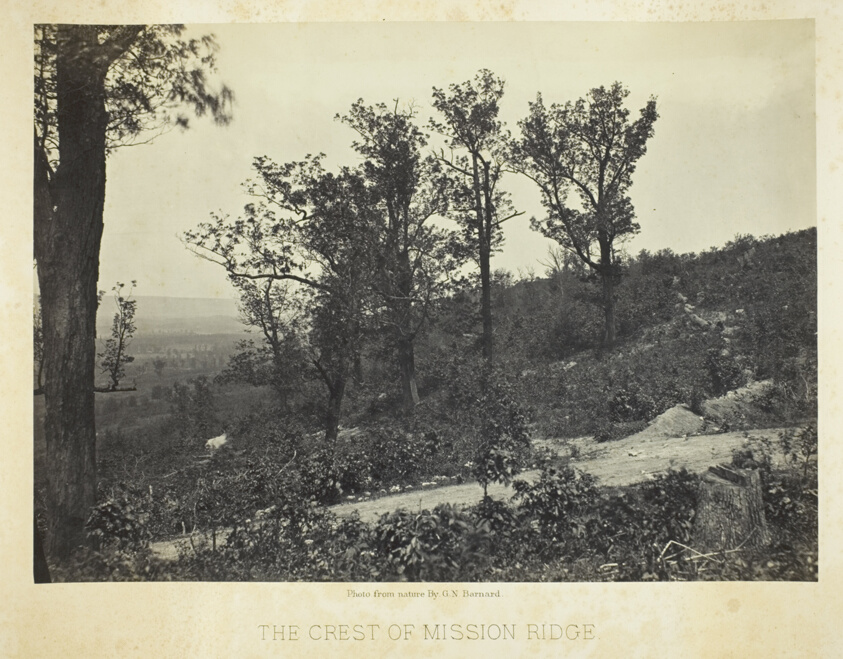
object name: Photograph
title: The Crest of Mission Ridge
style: 19th century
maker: George N. Barnard (American, 1819–1902)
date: 1864/66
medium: Albumen print, plate 11 from the album "Photographic Views of the Sherman Campaign" (1866)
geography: United States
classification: albumen silver print; photographic process; photography; photograph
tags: Collected by Hugh Edwards, Sherman's Campaign 1866